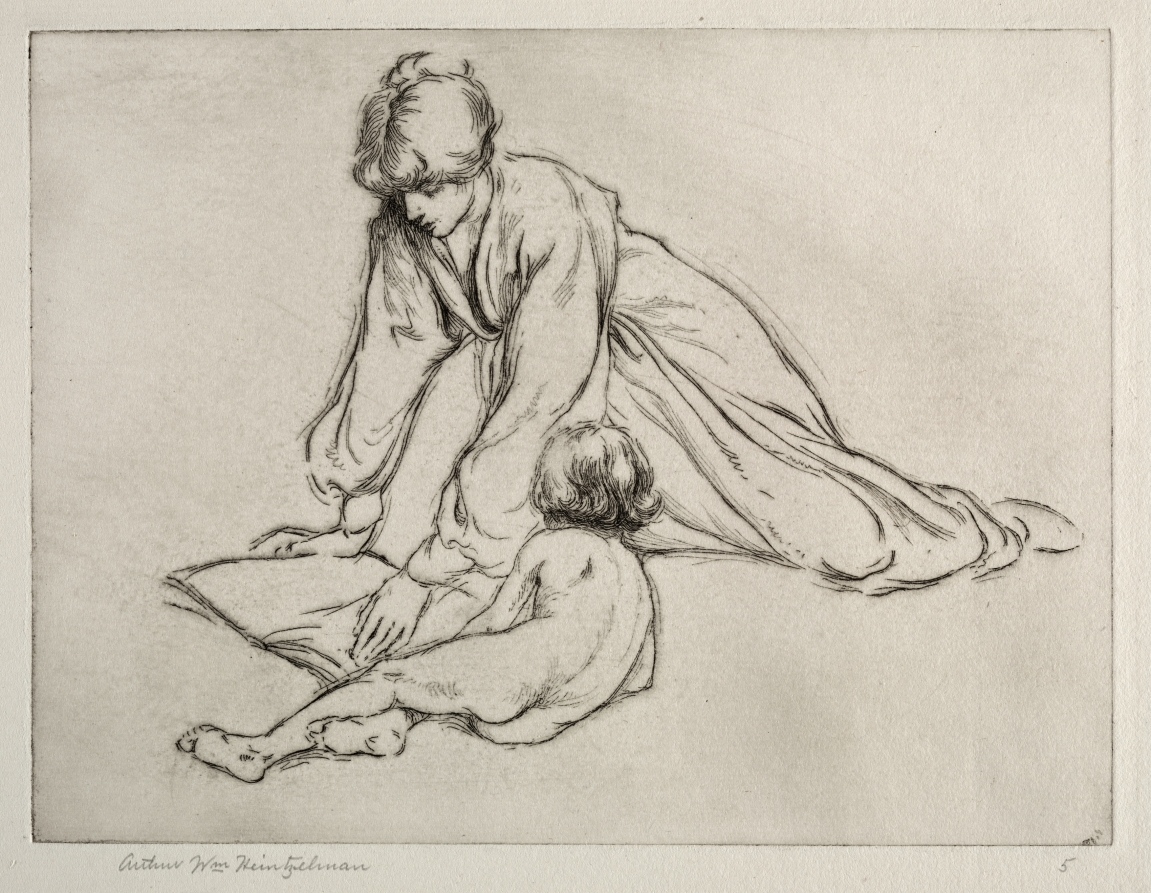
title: The Sun Bath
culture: America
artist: Arthur William Heintzelman (American, 1891–1965)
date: 1919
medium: etching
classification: Print